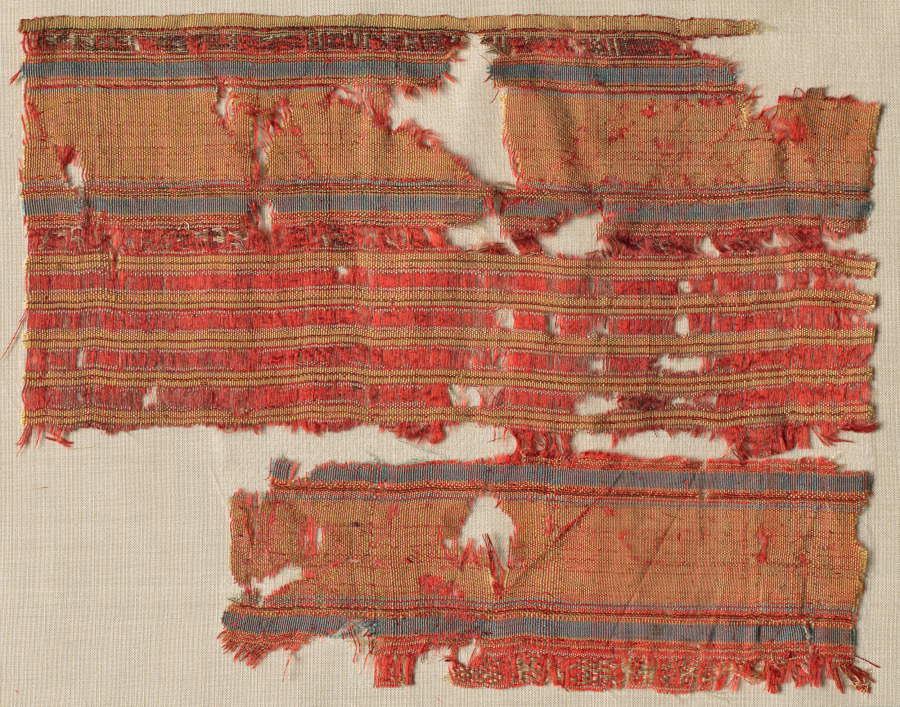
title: Striped fragment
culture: Egypt or Syria, Mamluk period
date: 1300s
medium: tabby and fancy weave; silk and gold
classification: Textile